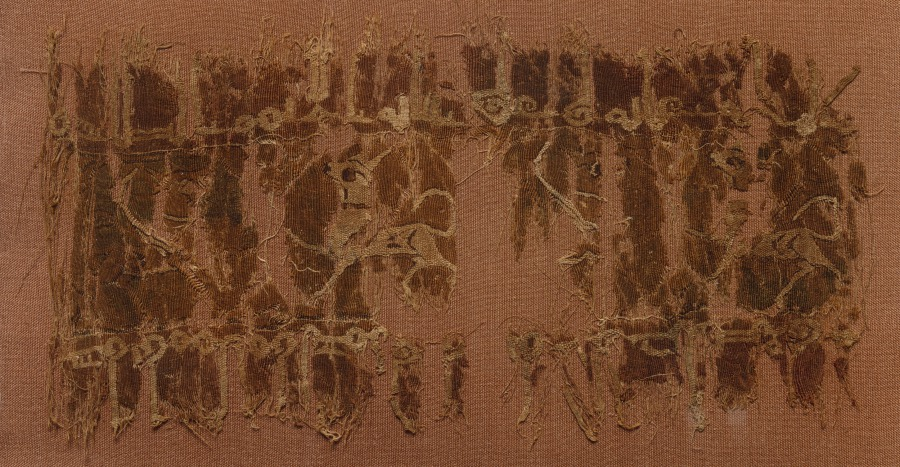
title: Fragment of a Tiraz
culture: Egypt, Fatimid period, Caliphate of al-Mustansir, 1000s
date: 1058–60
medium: Linen and silk: tapestry (originally inwoven in a tabby ground)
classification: Textile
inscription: The two lines of inscription in Kufic script, both of which are incomplete, appear to represent repetitions of a single text: (top line): ". . .[the blessings of] God be upon him and upon his forefathers, the pure imams" (bottom line): ". . . the pure [imams]. Of that which the most illustrious vizier and elect one of [the Commander of the Believers] . . ordered to be made. . ."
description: The tripartite band consists of a central band with a frieze of paired, confronted griffins, framed by oval cartouches which are delineated only by the joined trifoliate motifs which fill the spandrels. On either side are opposing lines of Arabic text in Kufic script. The two lines of inscription, both of which are incomplete, appear to represent repetitions of a single text.